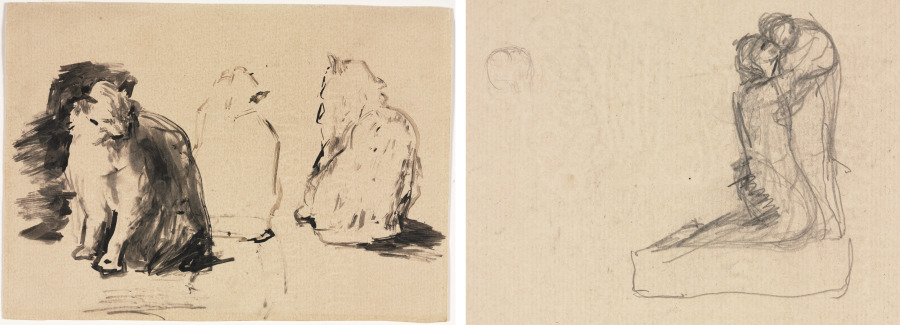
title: Cats (recto); Sketch of Two Figures Embracing (verso)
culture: France, 19th century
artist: Théodule Ribot (French, 1823–1891)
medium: pen and black ink and brush and black wash on paper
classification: Drawing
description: Drawing was an essential part of Théodule Ribot's practice and he often sketched his environs from life. As a realist artist, Ribot favored humble subjects taken from everyday life. This double-sided sheet was likely one that he reused for two disparate images: a cat viewed from three angles, perhaps in his studio, and what appears to be a sculpture of two figures embracing.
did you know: Théodule Ribot's son, Germain, was also a genre painter.